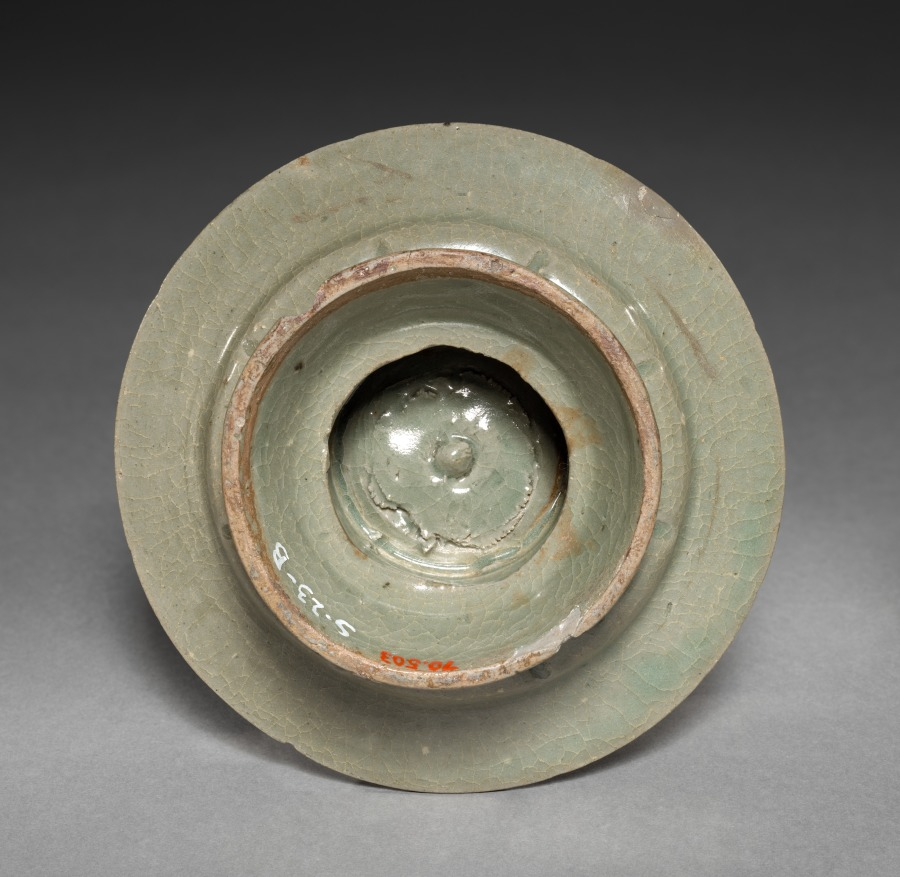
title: Floral-shaped Cup Stand with Inlaid Chrysanthemum Design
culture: Korea, Goryeo dynasty (918–1392)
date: 1100s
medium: inlaid and glazed porcelain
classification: Ceramic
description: As early as the 600s, the practice of drinking tea and wine became an important part of elite culture in Korea. Elites of the Goryeo period commissioned a variety of types of utensils and vessels including this delicate-looking cup stand, not only to make their drinking experience more exciting, but also to show their refined taste.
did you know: During the Goryeo period, a variety of types of tea ware, including this delicate-looking cup stand, were widely used.